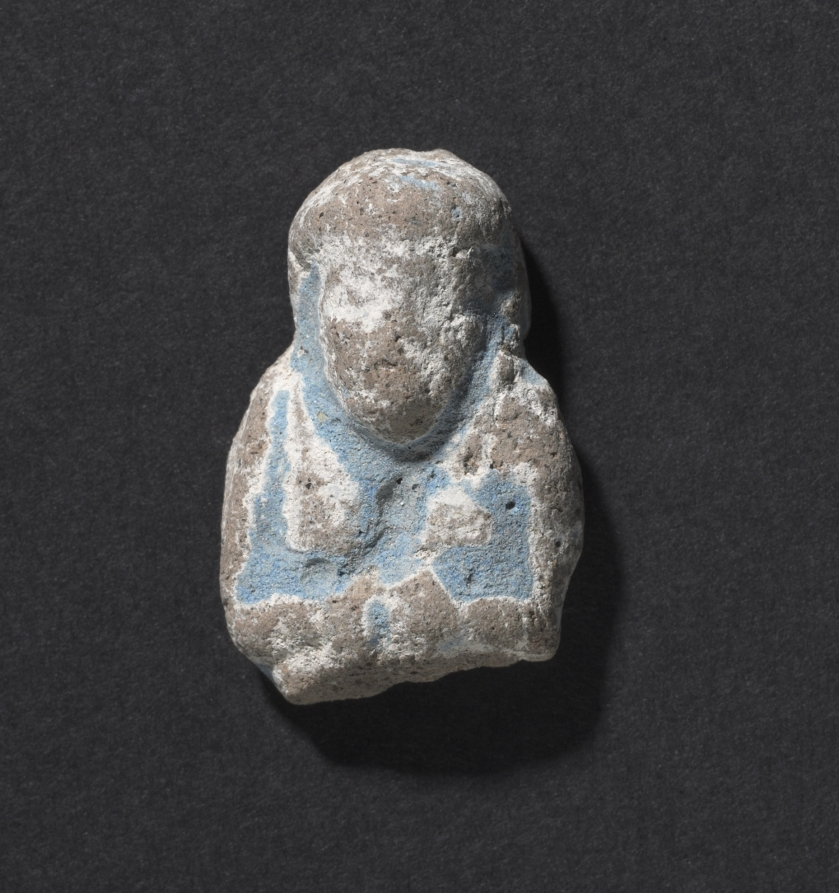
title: Shawabty of Ditamenpaankh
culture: Egypt, Late period (715–332 BCE), Dynasty 25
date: 715–656 BCE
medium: terracotta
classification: Funerary Equipment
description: High demand for shawabtys in the Late Period, a time when as many as 400 or more shawabtys were placed in the tomb with the deceased, gave rise to a specialized container for storing them: the shawabty box. This example is inscribed for the lady of the house, Ditamenpaankh, and was probably one of a pair originally made for her. The single-masted boat on the box's lid is perhaps an allusion to the pilgrimage of the deceased to the holy city of Abydos, the cult city of Osiris, king of the dead. The shawabtys inside are crude, mass-produced examples cast in an open mold. Made of terracotta, their blue paint imitates more costly shawabtys made of faience. As for the shawabty spell, it has been removed from its traditional location on the shawabty's front and relocated onto the sides of box, where it needed only to be written once, thus expediting production.